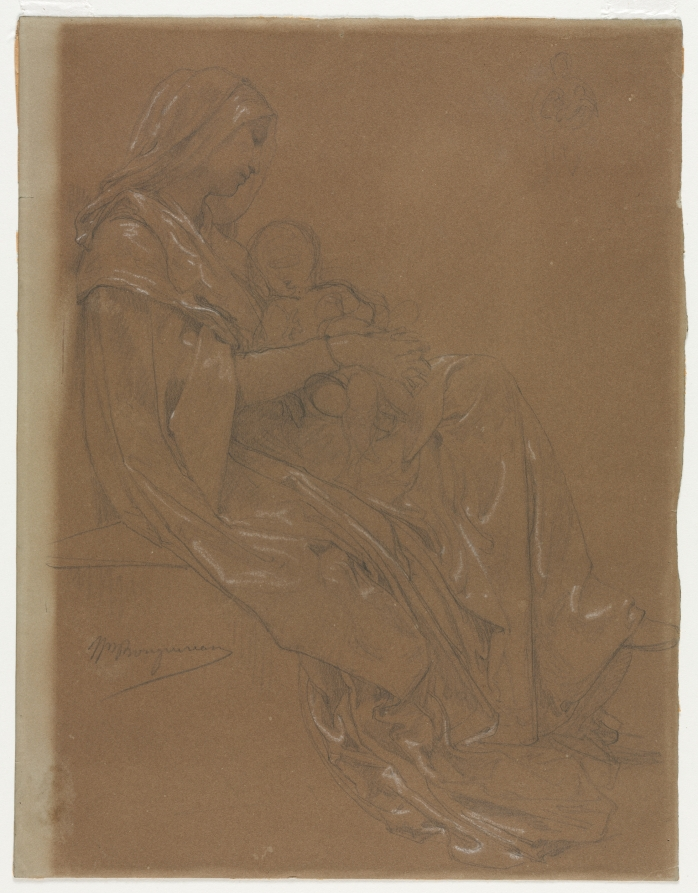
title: The Virgin and Child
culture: France, 19th century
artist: William Adolphe Bouguereau (French, 1825–1905)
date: second half 19th century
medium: graphite heightened with white chalk; small sketch upper right in graphite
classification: Drawing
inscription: signed, lower left, in graphite: Wm Bouguereau [underlined]